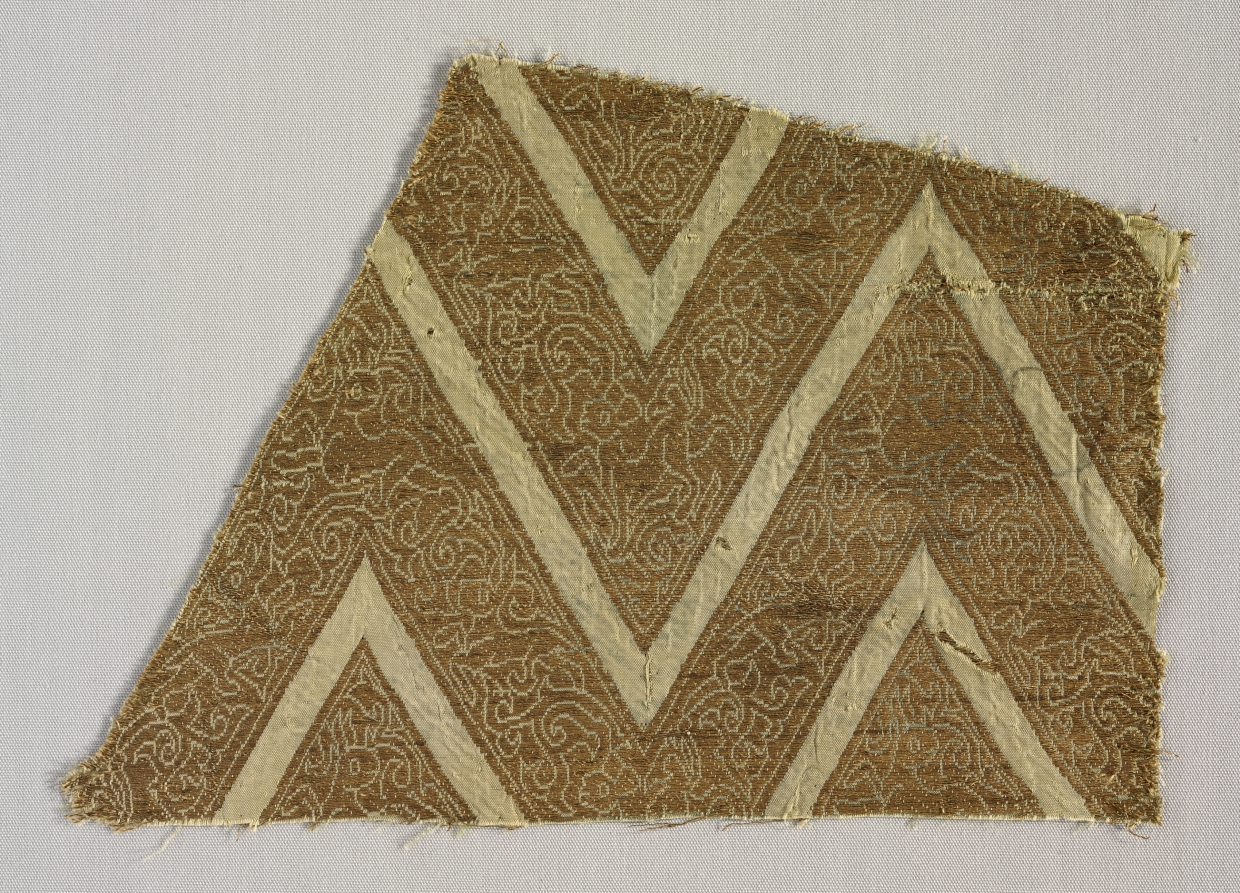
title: Fragment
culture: Iran or Iraq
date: late 1200s–1300s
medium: Silk: lampas weave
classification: Textile